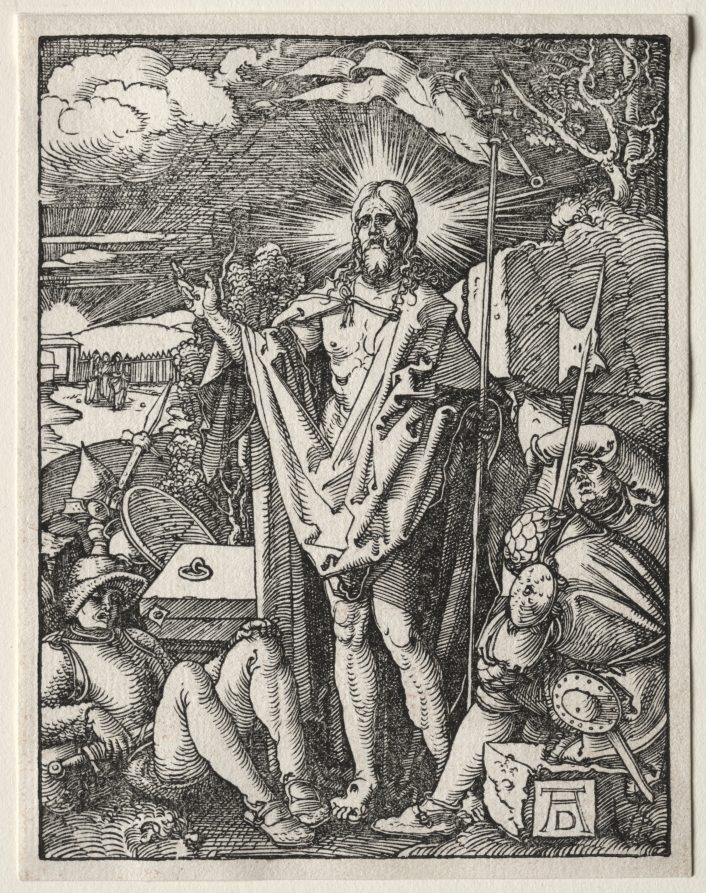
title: The Small Passion: The Resurrection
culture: France, 16th century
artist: Albrecht Dürer (German, 1471–1528)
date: 1509–1511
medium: woodcut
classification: Print